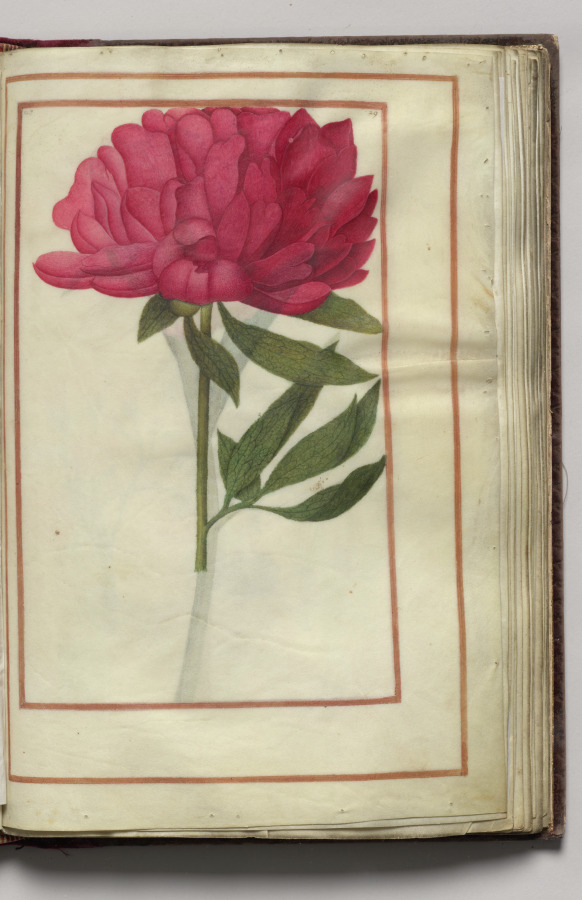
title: Red Peony, folio 17 (recto), from Florilegium (A Book of Flower Studies)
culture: France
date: 1608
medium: watercolor, ink, silver, and gold over occasional traces of pencil, on vellum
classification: Bound Volume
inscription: Dated: Poitiers 1608 (on frontispiece) Signed: On frontispiece in black ink, lower right: Van Kuyk Notation on drawing: Frontispiece: in pencil, lower margin: * élève de Van Kessel, peintre flammand (* in pencil also appears in front of Van Kuyk's name).